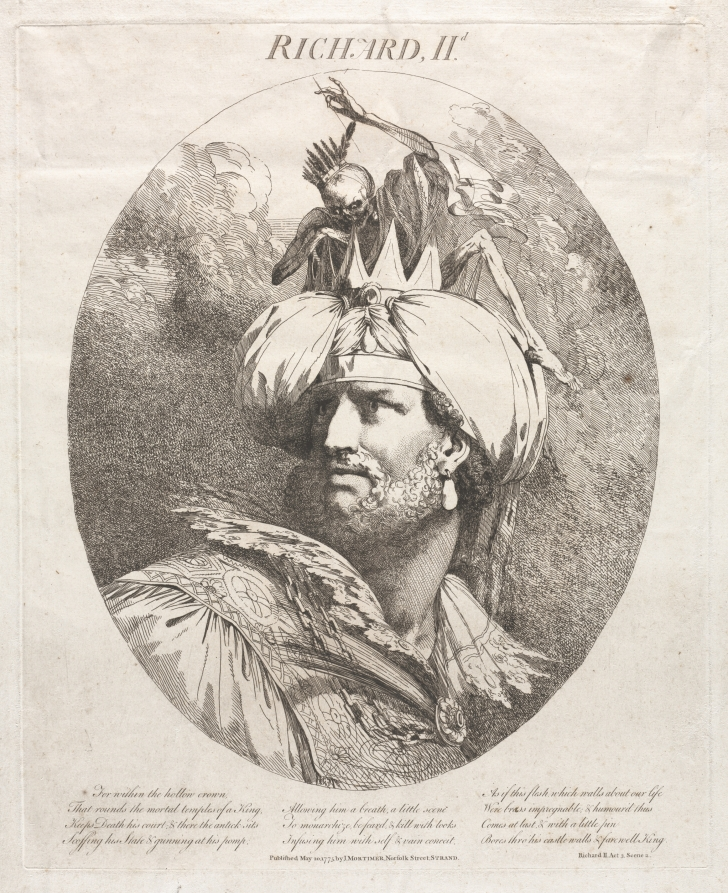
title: Richard II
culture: England, 18th century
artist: John Hamilton Mortimer (British, 1740–1779)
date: 1775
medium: etching in brown ink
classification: Print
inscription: inscribed lower right in pen and brown ink: N:161: J:M; numbered upper right corner in brown ink: 6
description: John Hamilton Mortimer supported the prevailing academic doctrine which located history painting at the top of the hierarchy of subject matter. Unlike many of his contemporaries, however, he turned to the great subjects of English literature for themes. From 1775 to 1776, Mortimer produced etchings of twelve Shakespearean characters, including King Lear, Ophelia, and Caliban. In this dramatic composition, the skeletal figure of death looms over the tense King Richard II. This rare signed proof is a marvelous example of Mortimer's Romantic sensibility. By the time he was twenty-three years old, Mortimer had won numerous prizes for his drawings and paintings and was considered one of the rising stars of English art. In 1774, he became president of the Society of Artists of Great Britain, to whose annual exhibitions he was a regular contributor. The artist's promising career was cut short by his untimely death at the age of thirty-nine.